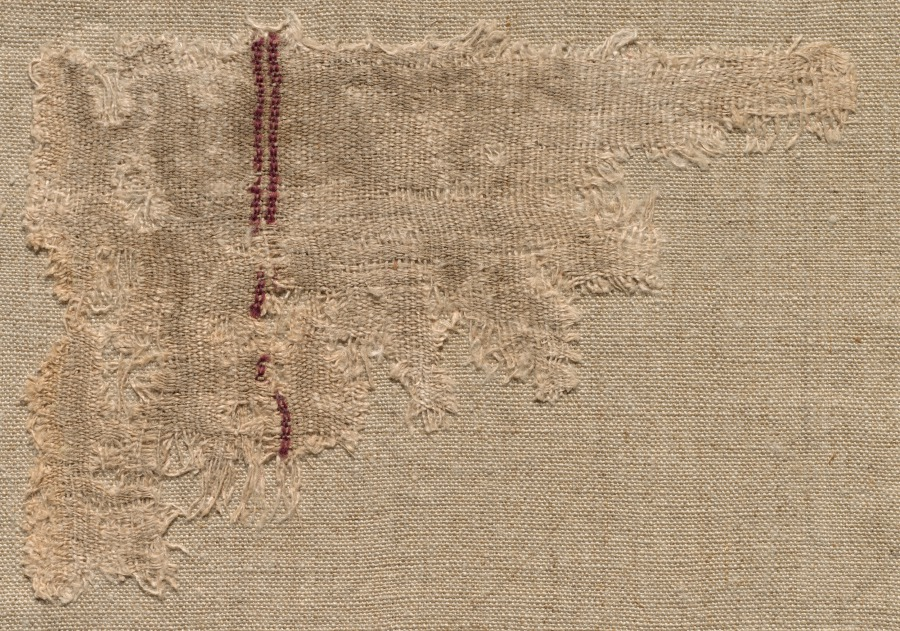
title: Rep Cloth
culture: Syria, Dura-Europos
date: 200s CE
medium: wool: rep cloth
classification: Textile